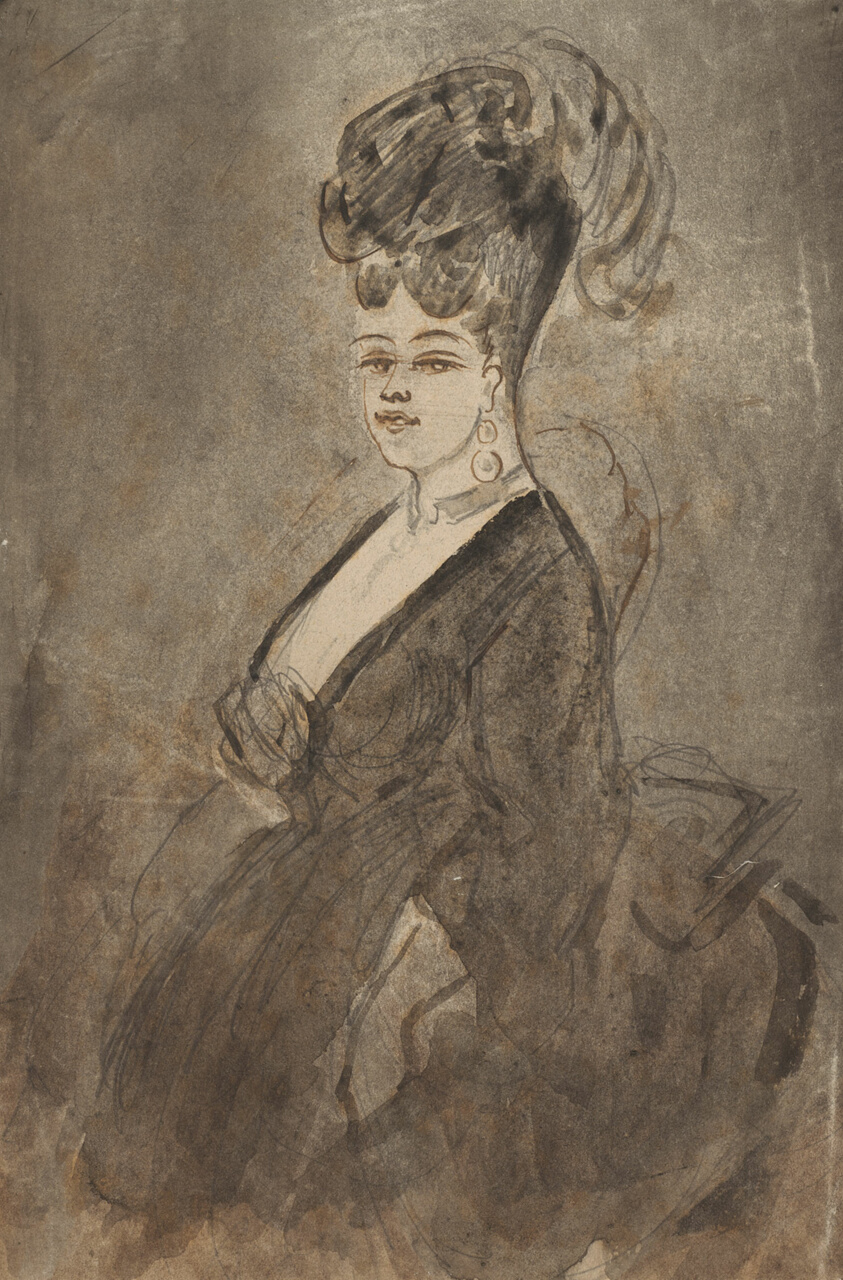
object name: Drawing and Watercolor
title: Three-Quarter Length Portrait of a Woman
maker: Constantin Guys (French, 1802-1892)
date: 1865/70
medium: Pen and brown ink, with brush and gray wash, over graphite, on ivory wove paper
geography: France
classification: ink or chalk wash; drawings (visual works); prints and drawing